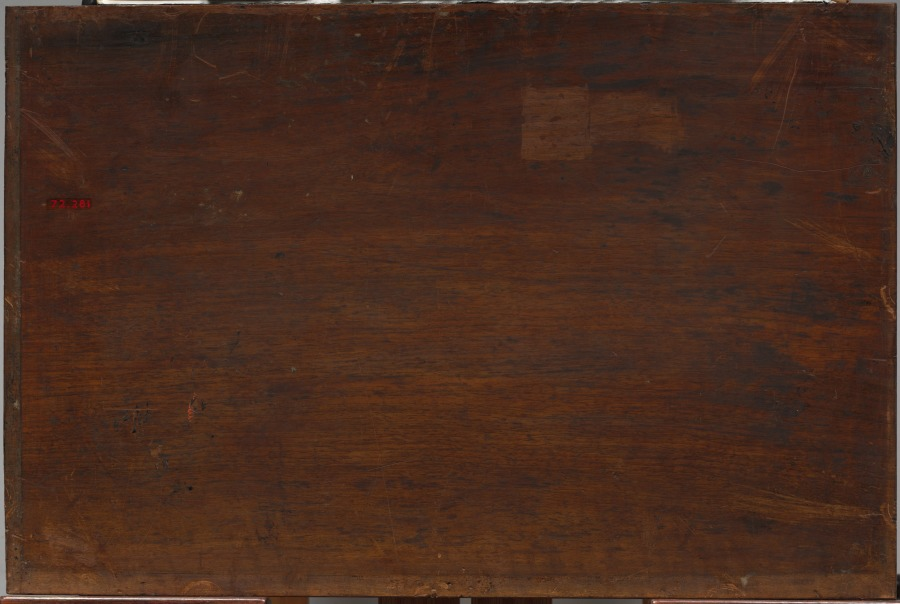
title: Figures on a Terrace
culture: France, 19th century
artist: attributed to Adolphe Monticelli (French, 1824–1886)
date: not dated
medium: oil on wood panel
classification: Painting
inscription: Signed lower left: Monticelli